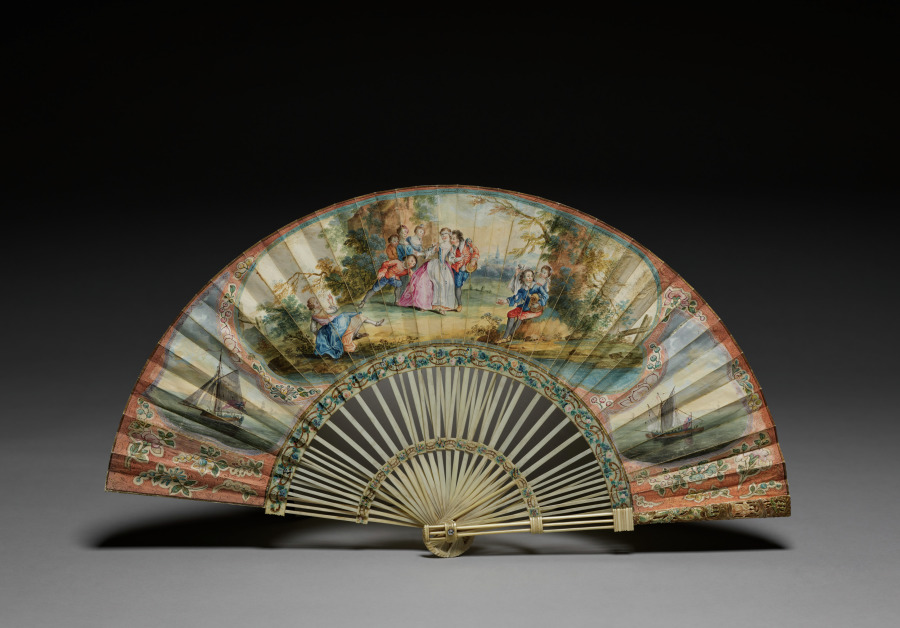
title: Folding Fan: A Children's Game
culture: Netherlands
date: c. 1760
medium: leaf: gouache on paper; frame: ivory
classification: Miscellaneous